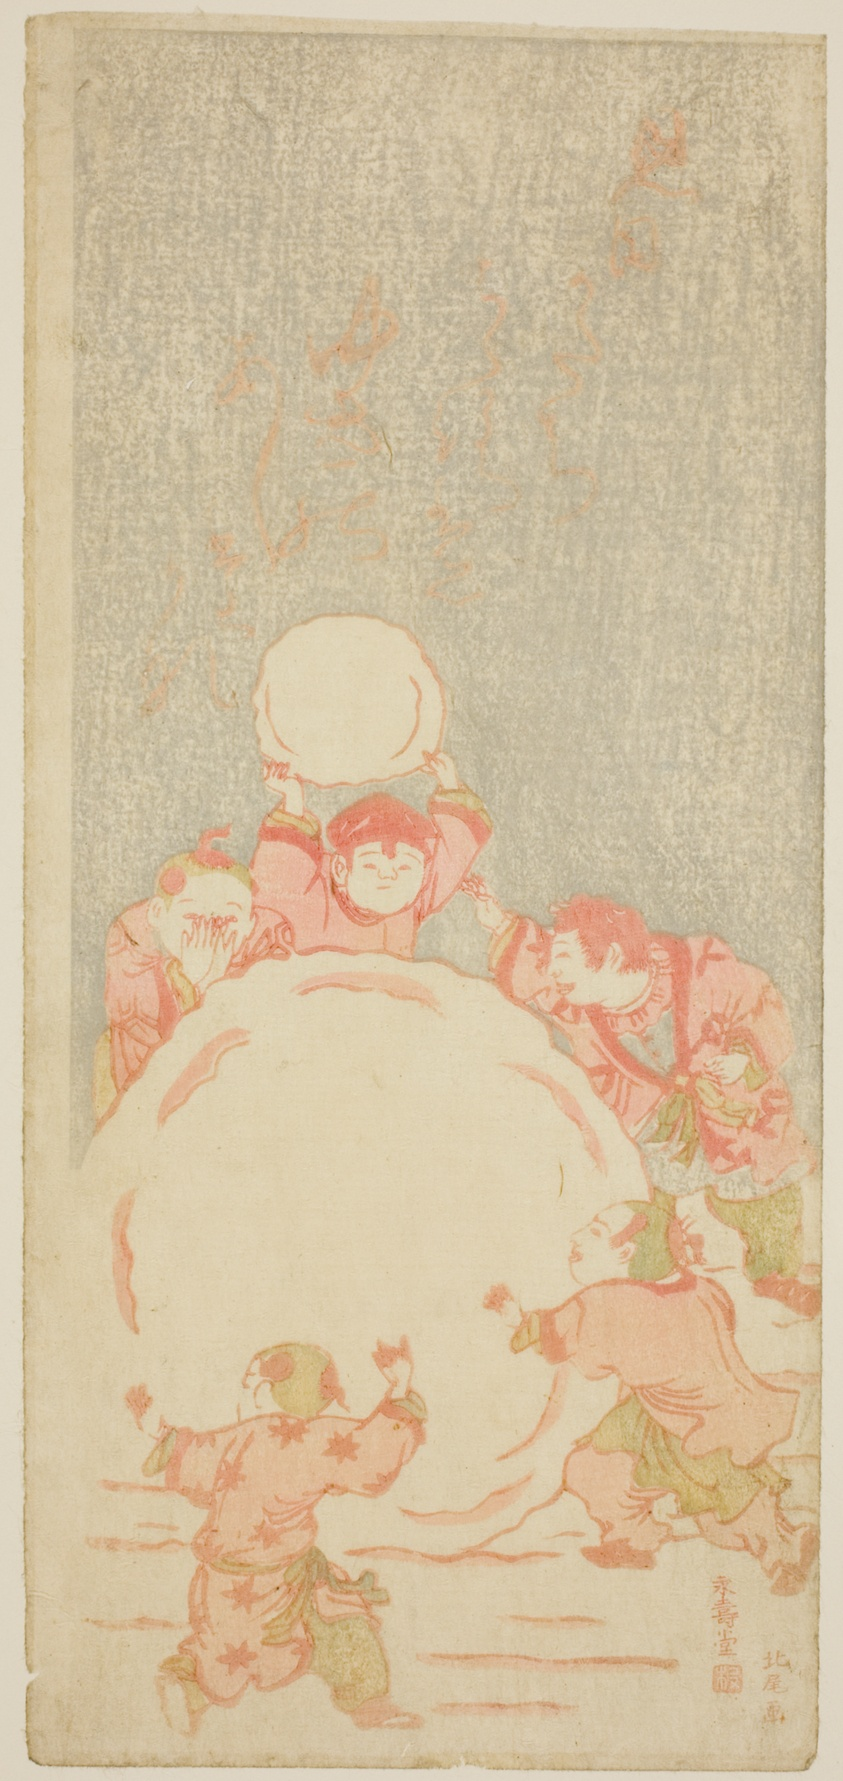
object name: Print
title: The Big Snowman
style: Japanese (culture or style)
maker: Kitao Shigemasa (Japanese, 1739–1820)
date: c. 1764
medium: Color woodblock print; mizu-e hosoban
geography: Japan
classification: woodblock print; print; asian art